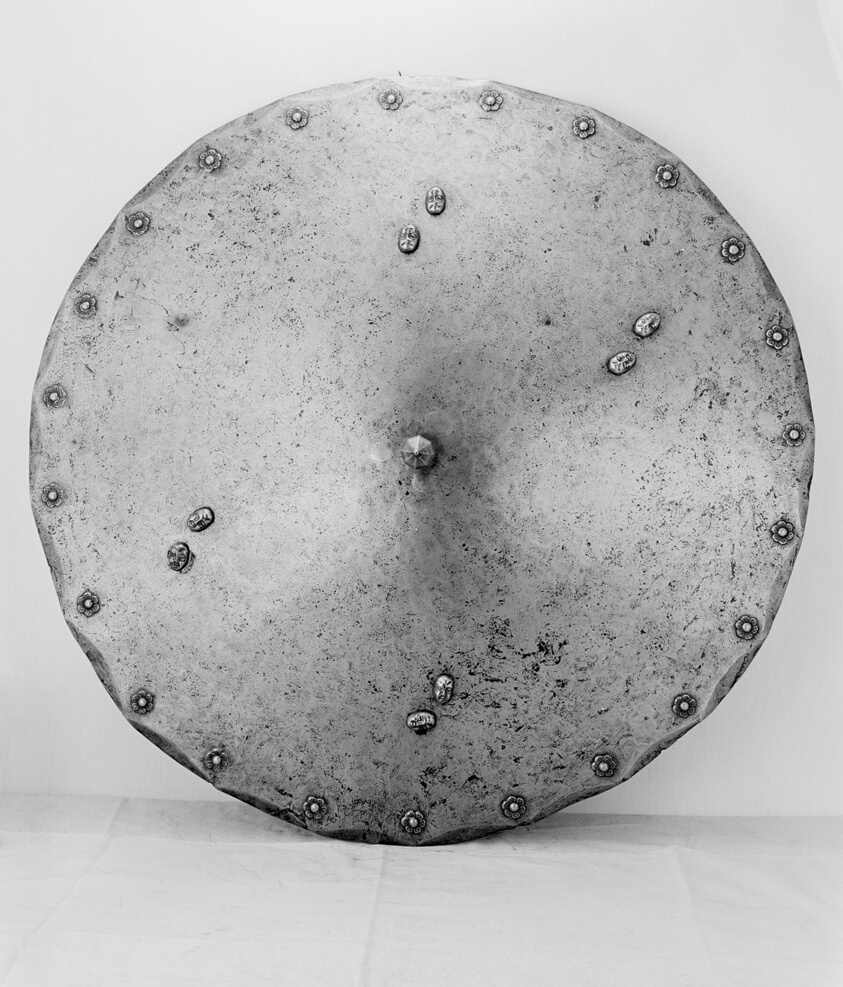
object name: Armor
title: Circular Target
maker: German, probably Nuremberg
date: 16th century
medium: Steel, brass, and leather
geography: Germany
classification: shield; armor; arms and armor